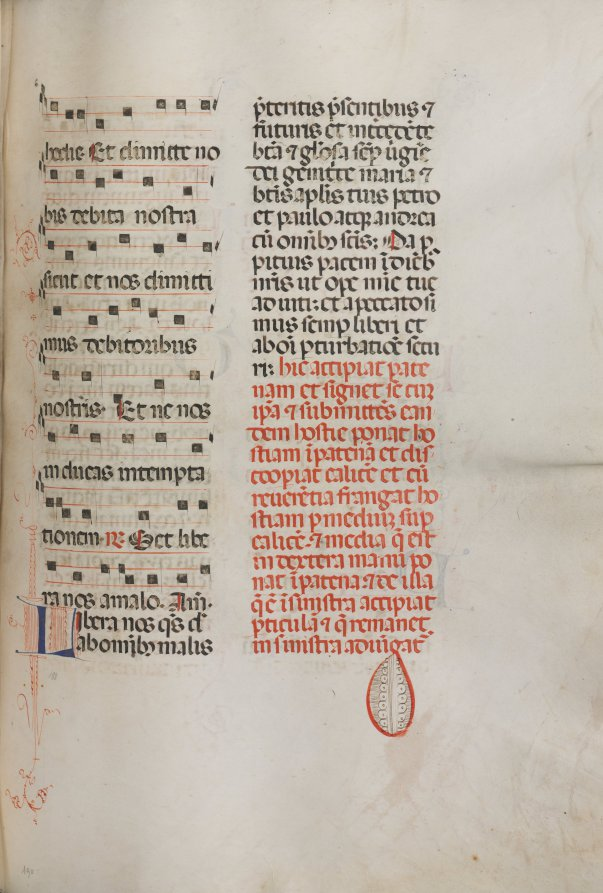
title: Missale: Fol. 190: Music for various prayers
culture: Italy, Perugia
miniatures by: Bartolommeo Caporali (Italian, c. 1420–1503)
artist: assisted by Giapeco Caporali (Italian, d. 1478)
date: 1469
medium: ink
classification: Bound Volume